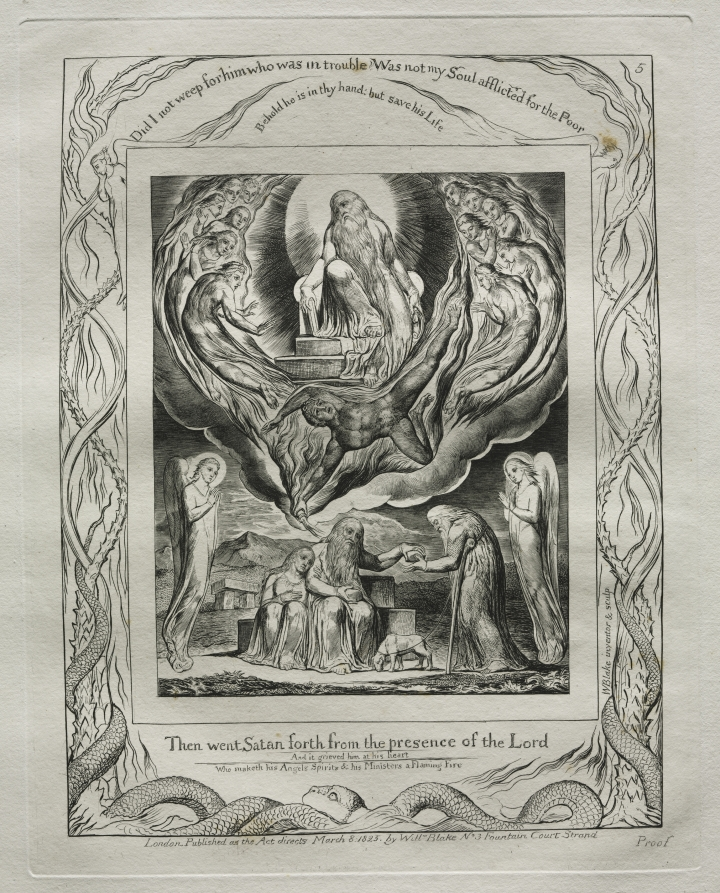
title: The Book of Job: Pl. 5, Then went Satan forth from the presence of the Lord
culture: England, 18th century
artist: William Blake (British, 1757–1827)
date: 1825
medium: engraving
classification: Portfolio